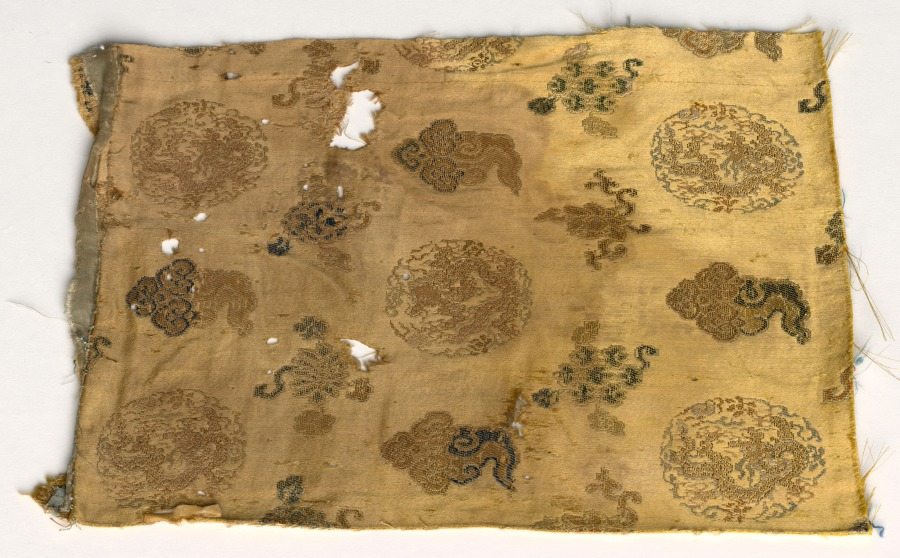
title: Fragment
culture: China, 18th century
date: 1700s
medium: brocaded satin, silk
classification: Textile